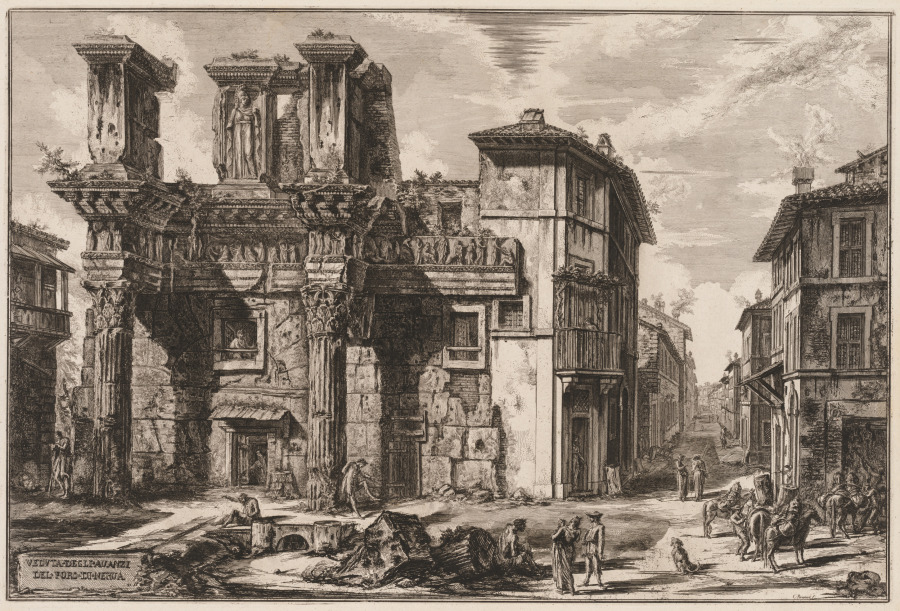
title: Views of Rome: Forum of Nerva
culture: Italy, 18th century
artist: Giovanni Battista Piranesi (Italian, 1720–1778)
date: c. 1770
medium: etching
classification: Print